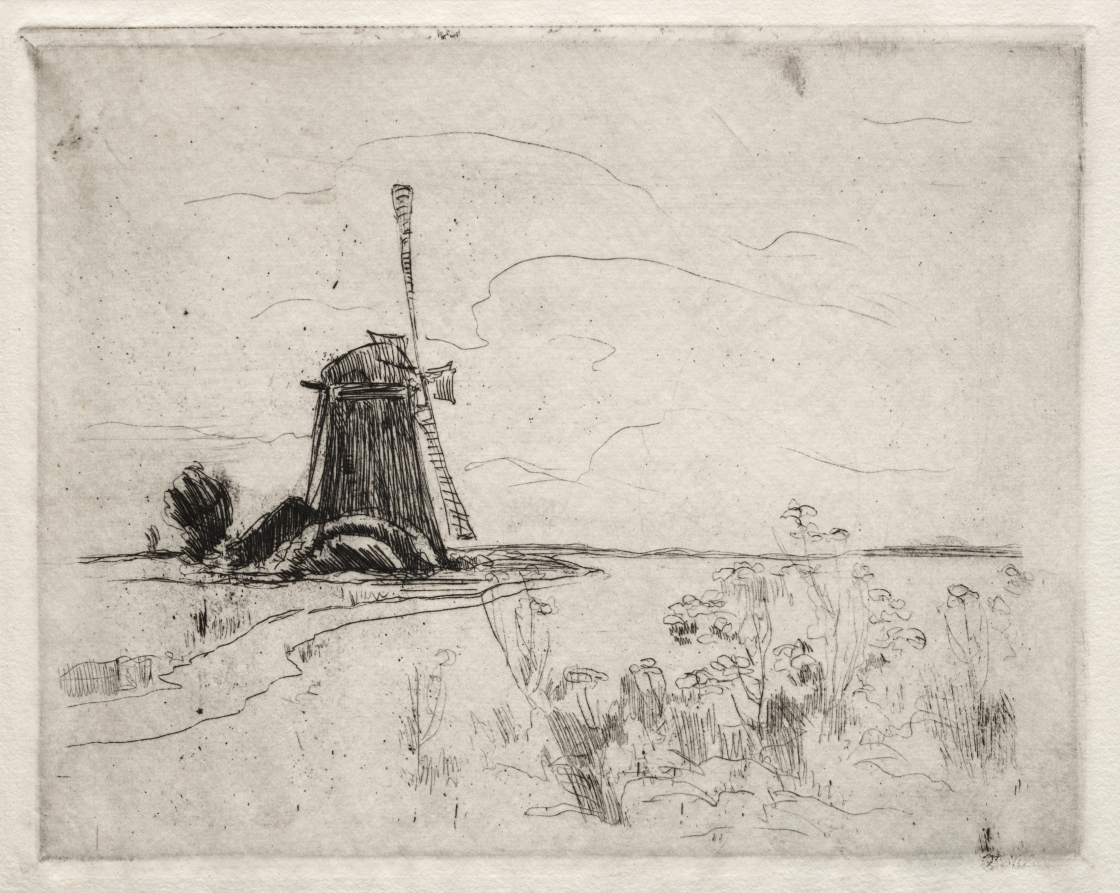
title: Mill and Weeds, Holland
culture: America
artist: John Henry Twachtman (American, 1853–1902)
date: 1884–89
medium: etching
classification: Print